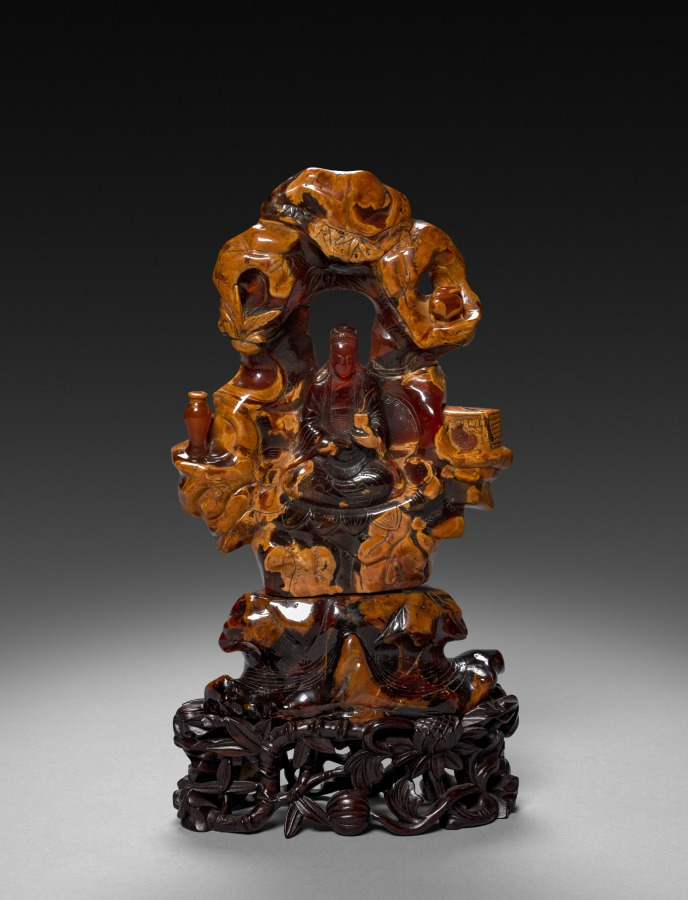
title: Bodhisattva Guanyin Seated in a Rock Grove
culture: China, Qing dynasty (1644-1911)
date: 1675–1700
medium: opaque ochre and translucent red-orange amber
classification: Sculpture